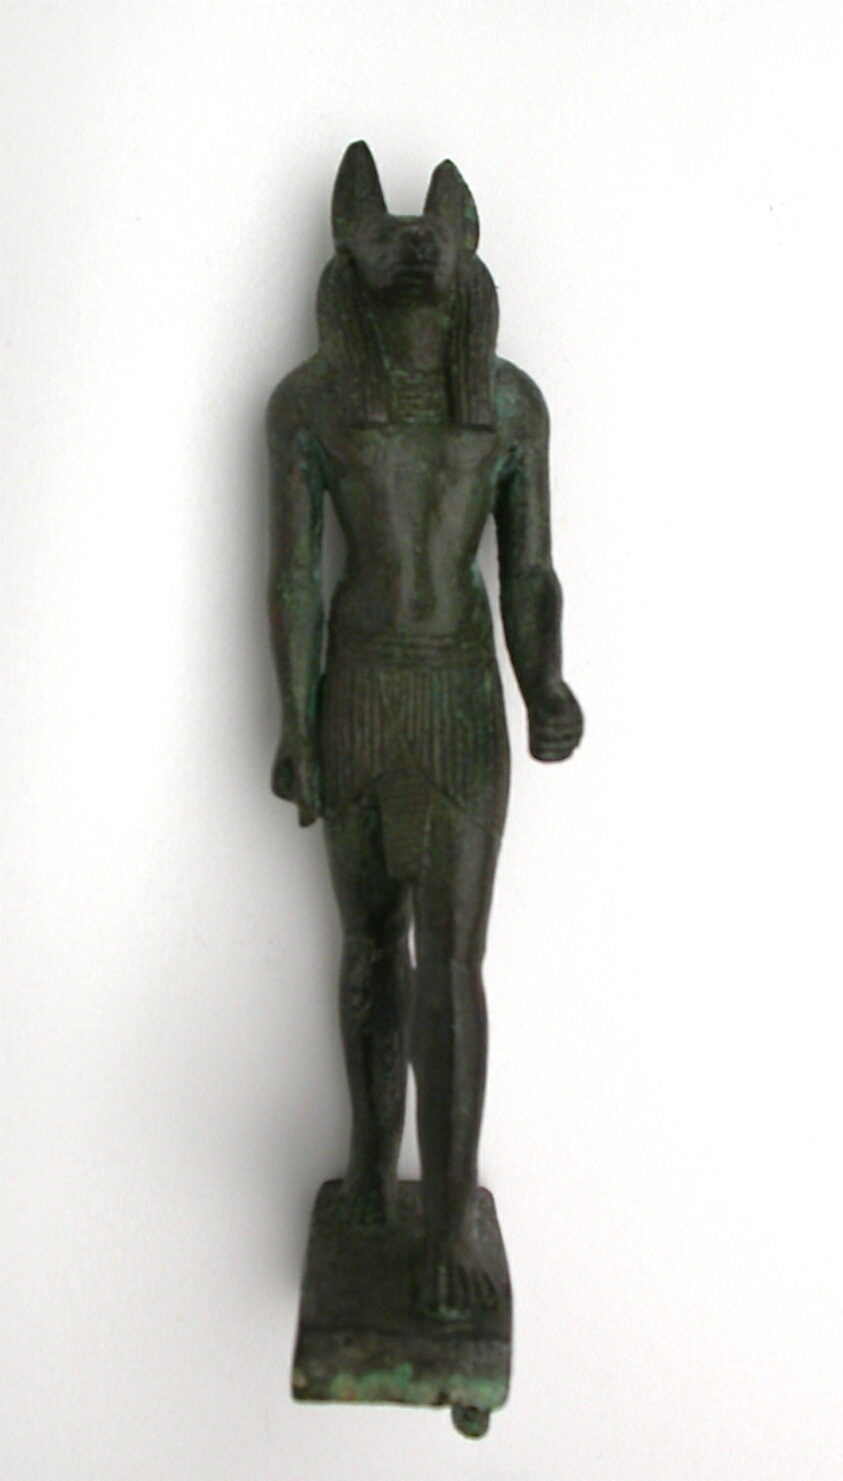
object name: Sculpture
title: Statuette of the God Anubis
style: egyptian, ancient, third intermediate period, late period (egyptian)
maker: Egyptian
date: Third Intermediate–Late Periods, Dynasties 21–31 (about 1069–332 BCE)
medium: Copper alloy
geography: Egypt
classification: statuette; bronze; metal; sculpture; ancient art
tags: gods (deities)